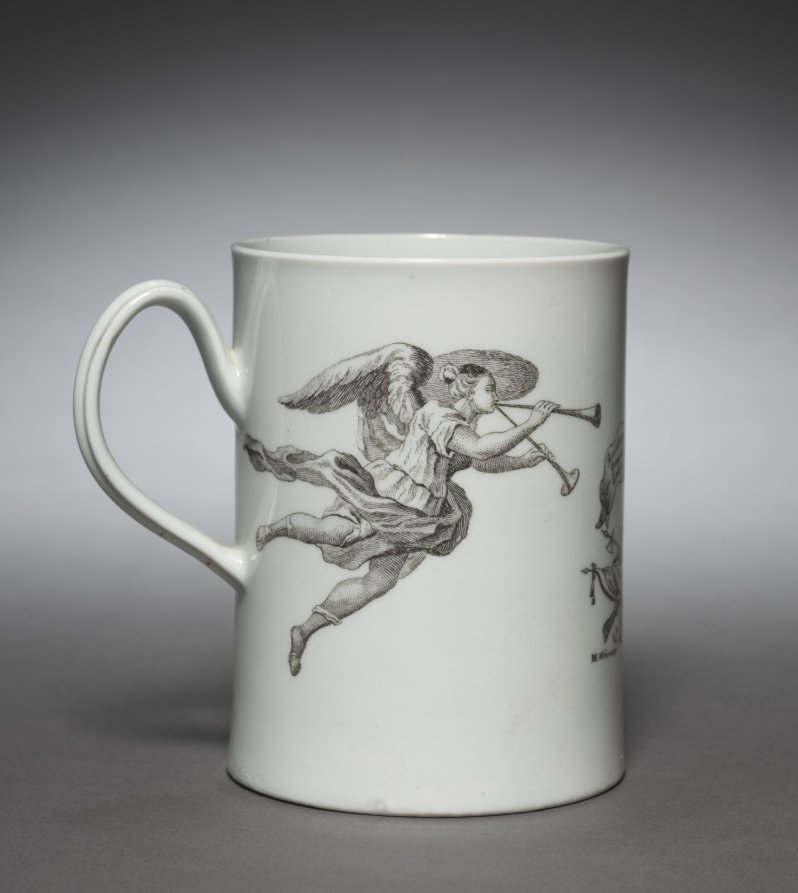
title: Cann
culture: England, 18th century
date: c. 1775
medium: ceramic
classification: Ceramic